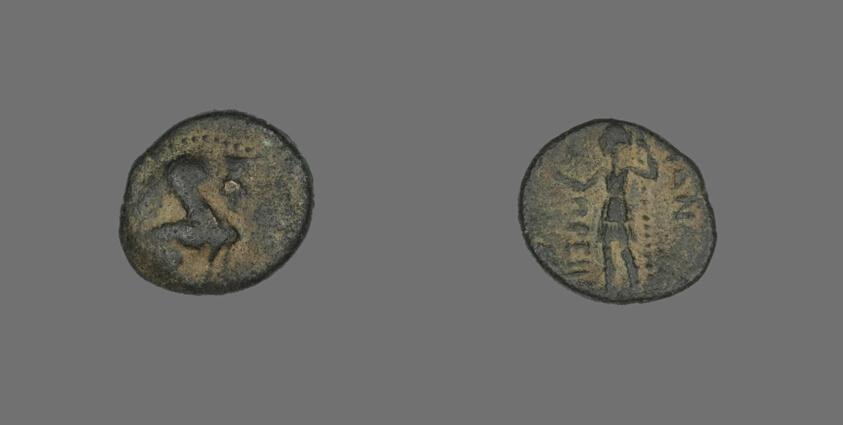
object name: Coin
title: Coin Depicting a Sphinx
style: greek, ancient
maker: Greek, minted in Perga, Pamphylia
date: 31 BCE-476 CE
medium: Bronze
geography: Ancient Greece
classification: coin; ancient art